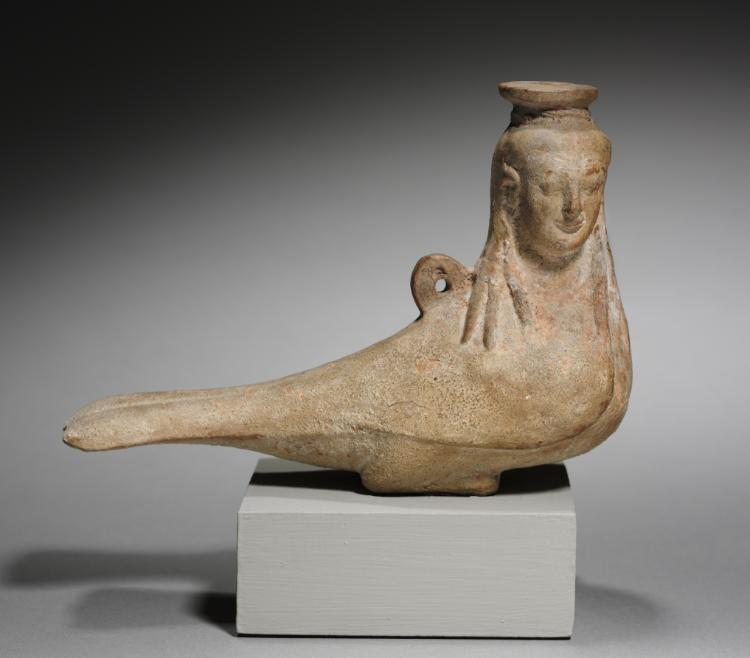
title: Siren-Shaped Perfume Flask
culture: Greece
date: 600–480 BCE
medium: terracotta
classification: Sculpture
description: A half-bird, half-woman creature, a siren lured sailors to death by the sweetness of her song. The most famous sirens appear in the ancient epic the Odyssey. Shaped like a siren, this vessel likely held valuable perfumed oil. Its small mouth limited spillage, and a string attached to the loops on its back allowed it to hand or hold a stopper.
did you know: In the Odyssey, Odysseus’s crew escapes the sirens by plugging their ears with wax.